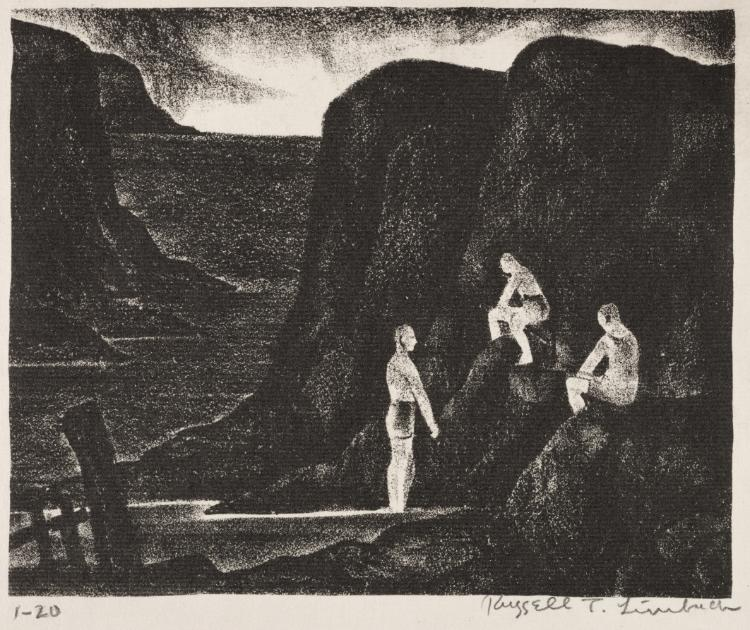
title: The Bathers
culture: America, Ohio, Cleveland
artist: Russell T. Limbach (American, 1904–1971)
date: c. 1927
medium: lithograph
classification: Print